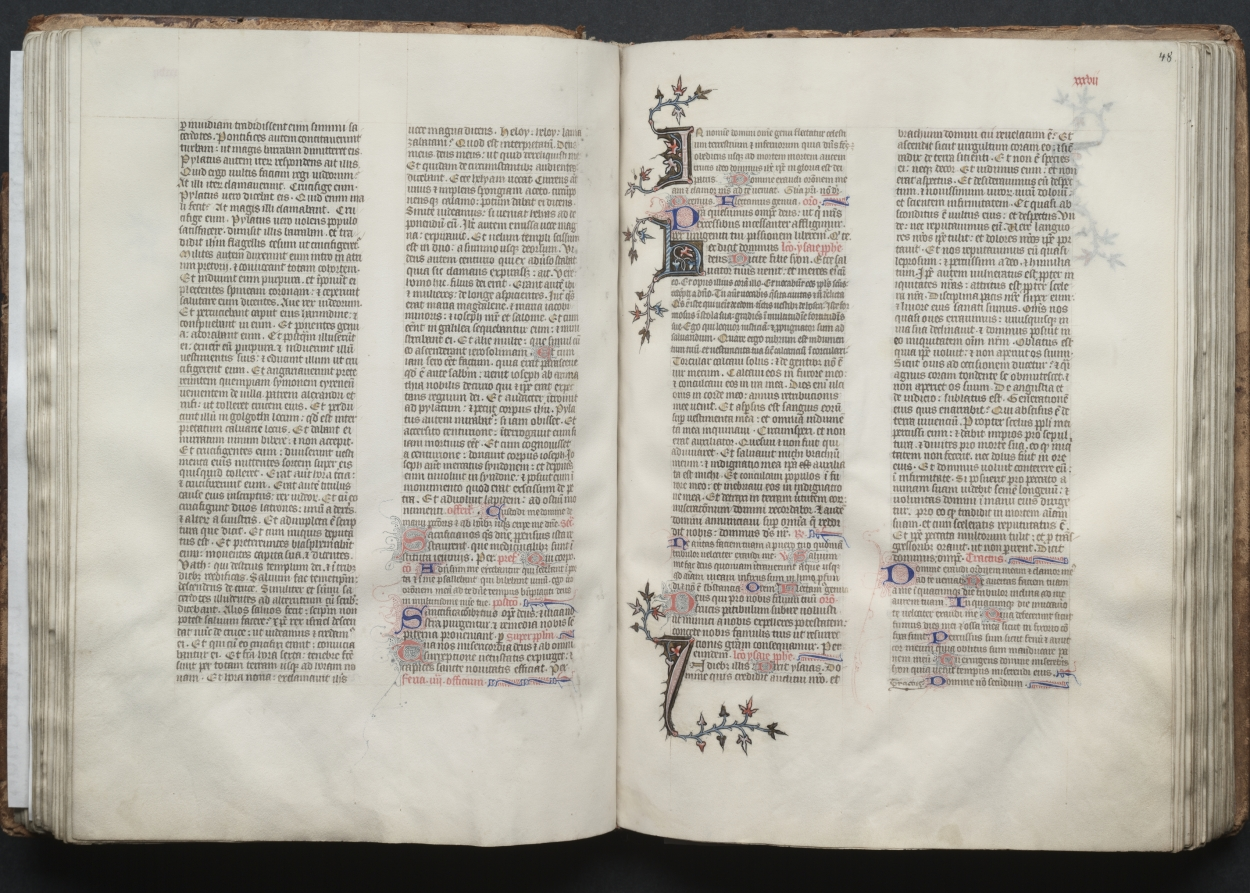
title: The Gotha Missal: Fol. 48r, Text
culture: France, Paris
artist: Master of the Boqueteaux (French)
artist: and Workshop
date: c. 1375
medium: ink, tempera, and gold on vellum; blind-tooled leather binding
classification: Bound Volume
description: The style and quality of this manuscript's decoration is typical of deluxe Parisian books made for aristocratic or royal patrons. Most of the book's decoration appears to be the work of the Master of the Boqueteaux, an artist active at the court of King Charles V (died 1380). His style was apparently shared by a number of book illuminators working in and around Paris. It is very possible that the Gotha Missal belonged to Charles V, but is not provable because the manuscript has no royal portraits and lacks a colophon. Given the book's magnificent decoration, however, it would seem that it was produced for a Valois prince, if not for the king himself. The manuscript receives its name from the German dukes of Gotha, its later owners.